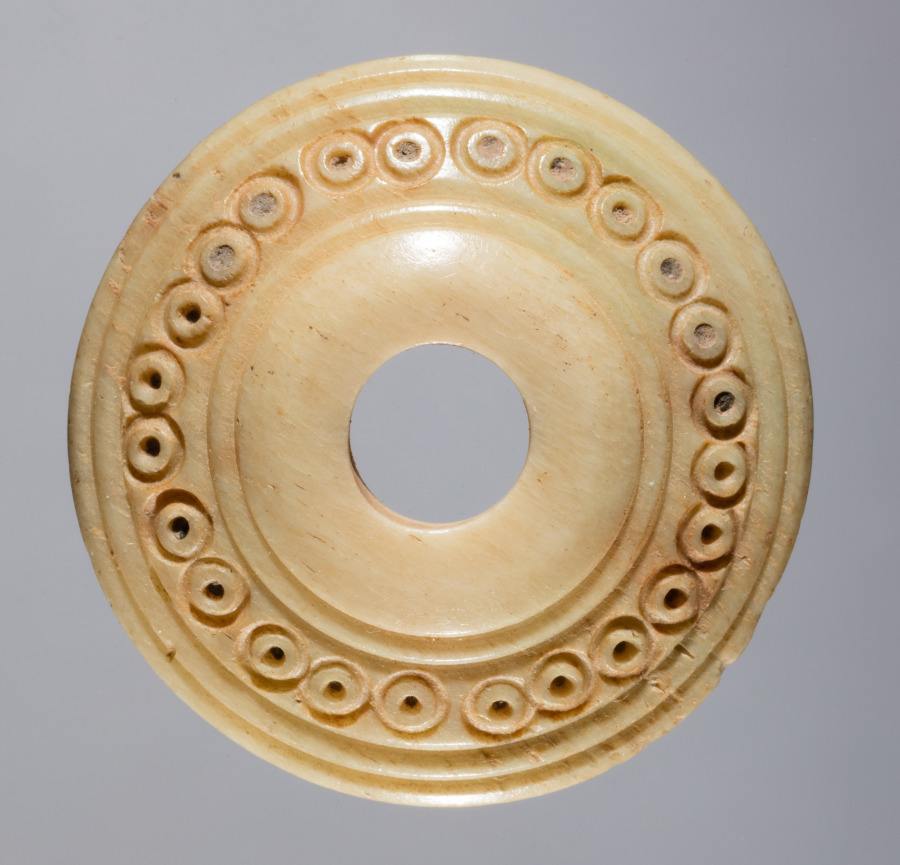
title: Spindle Whorl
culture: Iran, early Islamic period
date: 700s - 900s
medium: bone, incised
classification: Spindle Whorl